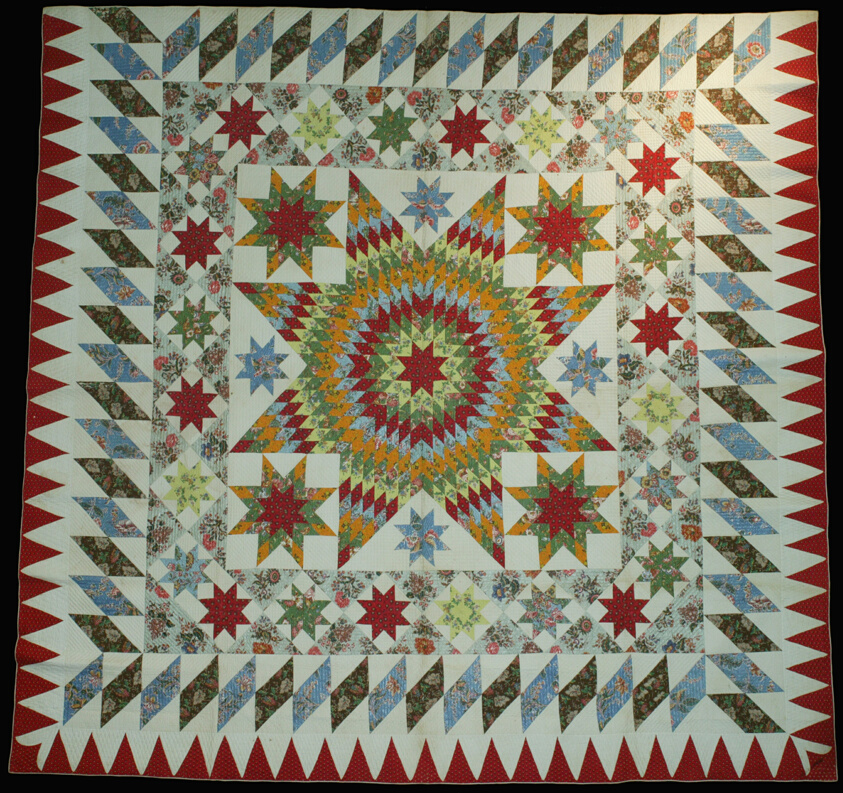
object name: Textile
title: Bedcover (Star of Bethlehem Quilt)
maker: Possibly Newburgh, New York, United States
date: c. 1830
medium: Cotton, various plain weaves; printed; some calendarized and glazed; pieced; lined with cotton, plain weave; pieced; batting: cotton; quilted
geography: Newburgh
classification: needlework - quilt; textile